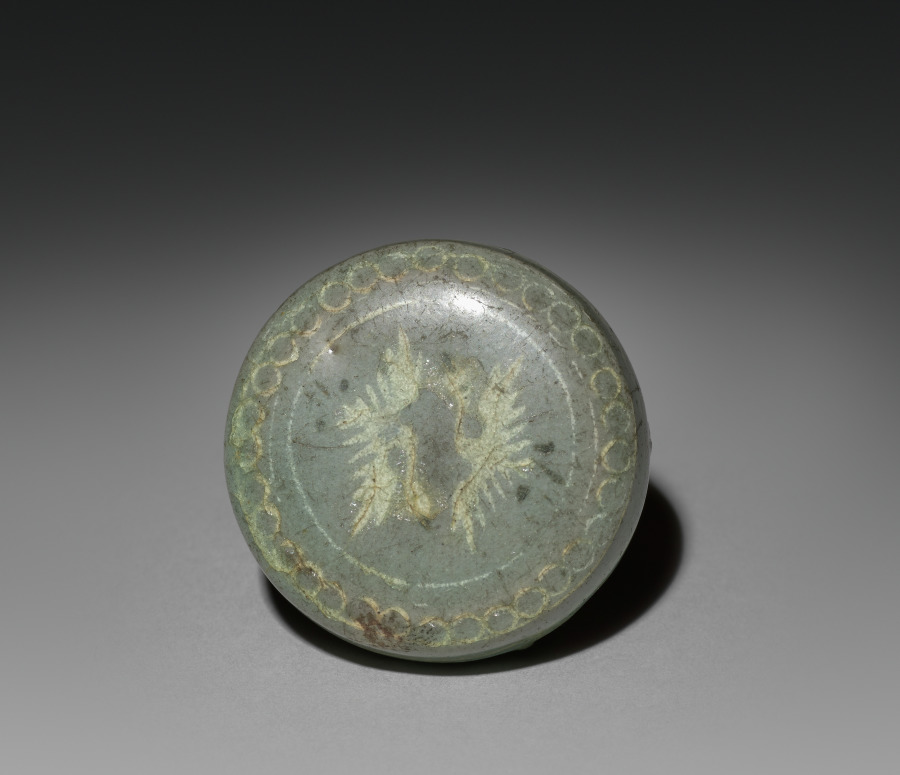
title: Box and Cover (lid)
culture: Korea, Goryeo dynasty (918–1392)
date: 918–1392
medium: celadon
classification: Ceramic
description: Celadons, spoons, seals, and bronze mirrors were the most common burial objects in tombs during the Goryeo period (918-1392). Once used to contain color powder, rouge and eyebrow gel for makeup, this small container was one of the standard goods that furnished elites' tombs. Goryeo-period women and men used the grain powder of rice or millet for whitening their skin, safflower extract for rouge, and plant ash or soot for eyebrow gel. Yet, natural-looking make-up seems to have been the most favorable one in Korea according to the travelogue by Xu Jing (1091-1153), the Chinese diplomat who visited Korea in 1123.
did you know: This ceramic container was used to store either incense or cosmetics.